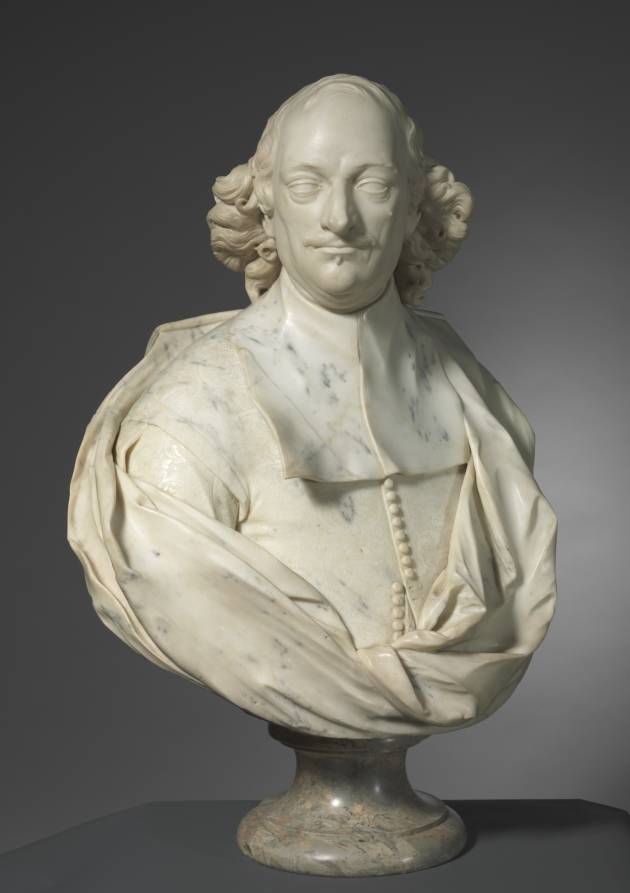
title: Portrait of Fabrizio Naro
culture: Italy, Rome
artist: Domenico Guidi (Italian, 1625–1701)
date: c. 1680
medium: marble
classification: Sculpture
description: This figure’s individualized facial expression, dynamic turn of the head and animated drapery are all characteristic of 17th-century Roman portrait sculpture. Guidi, a pupil of Alessandro Algardi, juxtaposed broad swaths of drapery and deeply drilled and carved hair with delicate surface detail, visible here in the patterning of the jacket and the faint suggestion of a beard. Based on a comparison with a later portrait on the family tomb in the church of Santa Maria sopra Minerva, Rome, the sitter has been identified as Fabrizio Naro (d. 1697), marquis of Mompei.